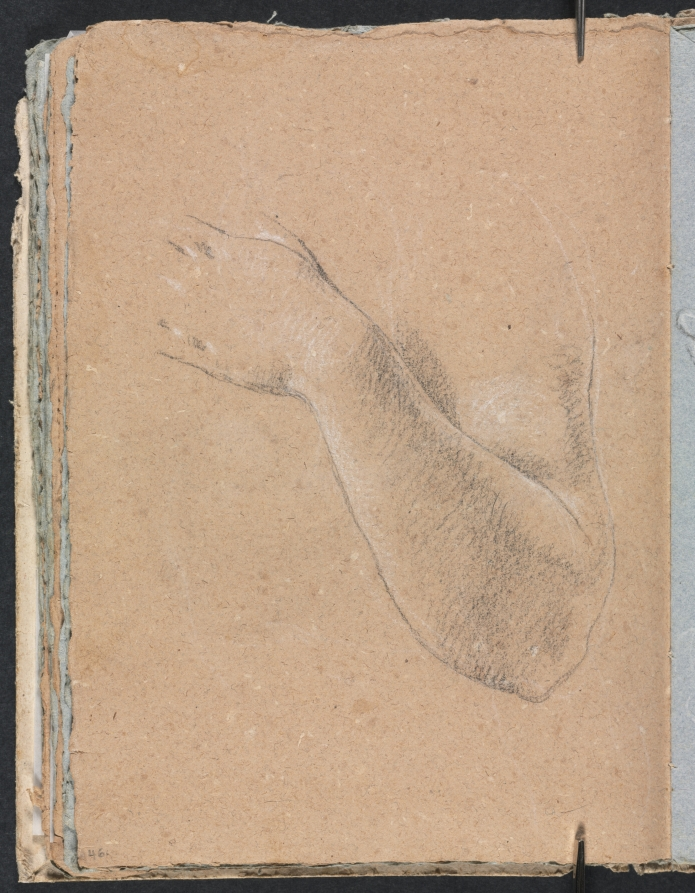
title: Verona Sketchbook: Left arm and hand (page 46)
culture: Italy, 18th century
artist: Francesco Lorenzi (Italian, 1723–1787)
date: 1760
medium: black chalk with white heightening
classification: Bound Volume